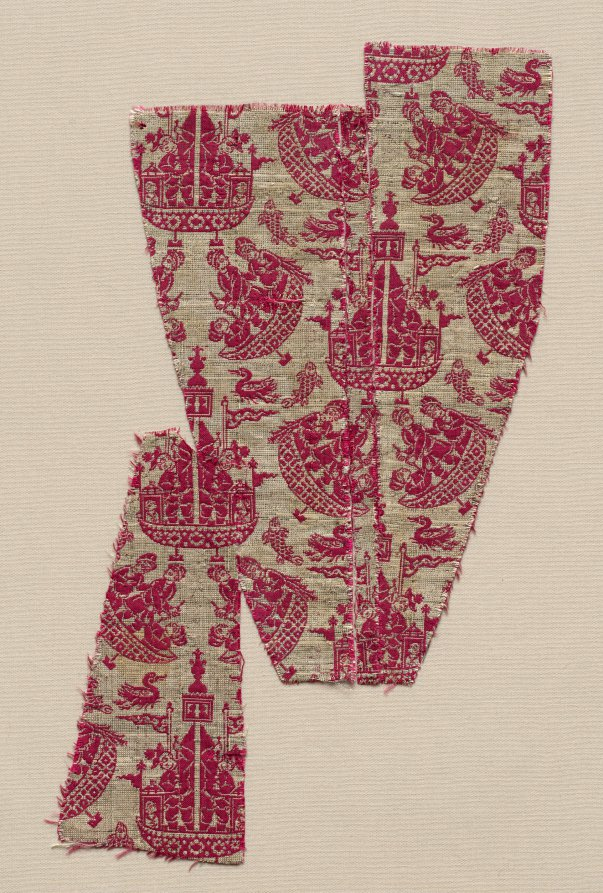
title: Fragment with maritime scene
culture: Iran, Safavid period (1501–1722)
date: late 1600s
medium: silk and silver-metal thread: double cloth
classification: Textile